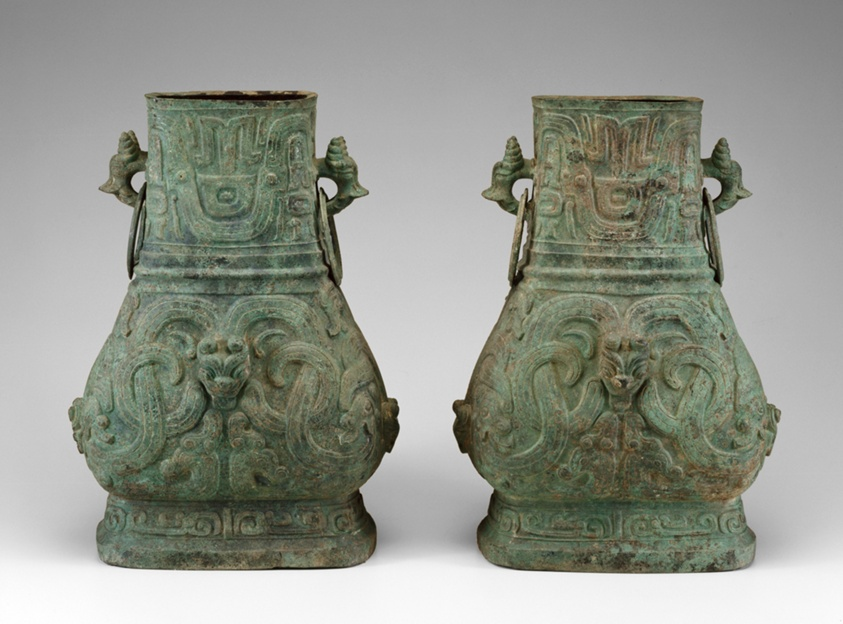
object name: Religious/Ritual Object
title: Paiar of Jars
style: Chinese (culture or style)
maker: China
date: Western Zhou dynasty (c. 1046–771 BC ), late 9th/8th BC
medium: Bronze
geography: China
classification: vessel; vessel for serving drinks; bronze; metal; asian art; ritual objects